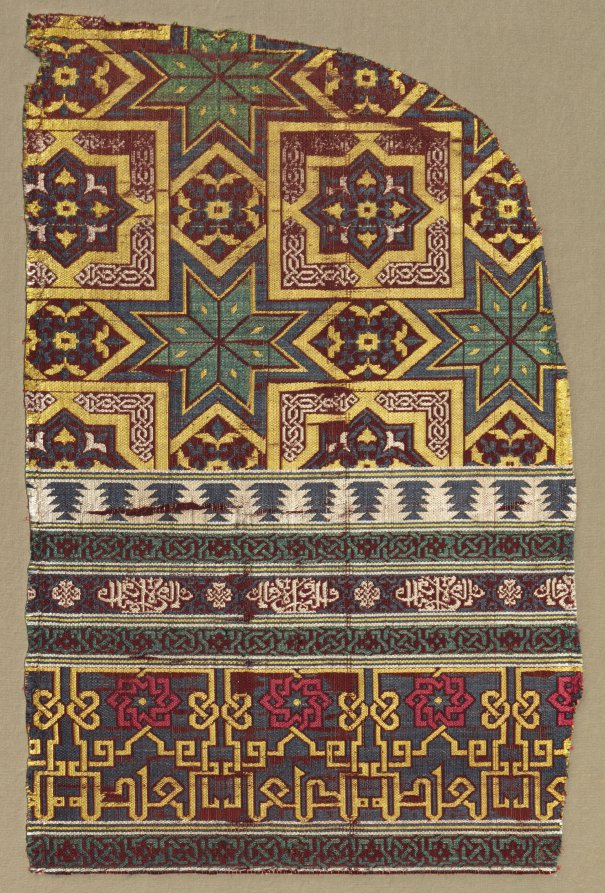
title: Alhambra hanging fragment with decorated bands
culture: Spain, Granada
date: 1300s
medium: Silk: lampas and taqueté weave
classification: Textile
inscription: the principal field of geometric laceria forming stars and squares is bordered by a broad composite band (incomplete) consisting of central wide band with knotted Kufic inscription ("beatitude"), framed by narrower bands with knotwork, Naskhi inscriptions ("success and prosperity") in cartouches and crenallations.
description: The ability to harmoniously combine intricate designs and varied colors was one of the unparalleled achievements of Islamic art. This silk curtain fragment reveals juxtapositions of large- and small-scaled patterns, woven with bold contrasting colors in bands of varying widths. Segments of Arabic text have been woven into the design. The repeated phrase good fortune and prosperity is woven in ivory silk in one of the narrow bands. In the wide band at the bottom, Kufic script in yellow silk extends the word beatitude.